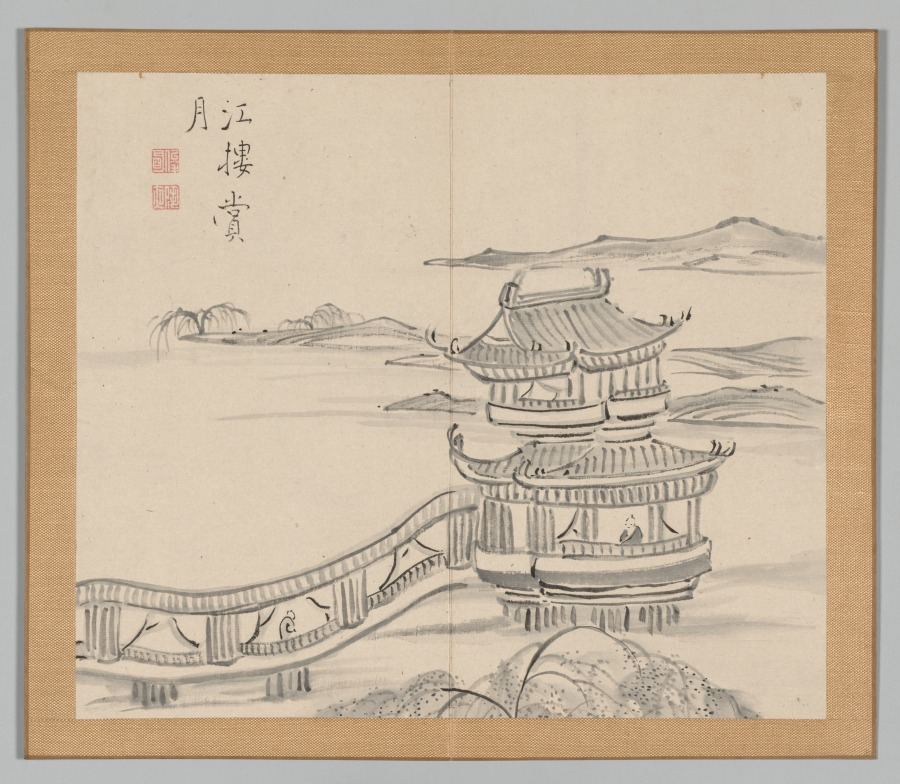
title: Reverberations of Taiga, Volume 2 (leaf 25)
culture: Japan, Edo period (1615–1868)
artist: Aoki Shukuya (Japanese, d. 1802)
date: mid-1700s–1802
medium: double-leaf from a pair of albums; ink and light color on paper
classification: Portfolio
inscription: 江楼賞月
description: Aoki Shukuya was a top student of painter Ike Taiga and took responsibility for Taiga’s stylistic legacy. A painting album by Taiga, part of which survives today in Kyoto in hanging scroll format, served as the source for this painting by Shukuya and the matching designs from a set of wood-block–printed volumes published in 1804. The postscript to the books, written and carved by the scholar Minagawa Kien (皆川淇園) (1735–1807), explains that Taiga produced the original album for his wife and fellow painter Tokuyama Gyokuran (徳山玉瀾) (1727/28–1784). The final design in the first volume of the books and Shukuya’s corresponding painting include the text “viewing the moon from a river pavilion” (江楼賞月). The scene alludes to a poem by Tang dynasty (618–907) poet Zhao Gu (趙嘏) (Chinese, active mid-800s). In the poem, a person gazes at the moon from a riverside pavilion and reflects on the absence of a companion who had admired it with him at the same place the year before.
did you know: Traditionally, young painters in Japan began their studies with an established master painter. The master's compositions invariably became models that the apprentice copied to learn various ink and brush techniques.